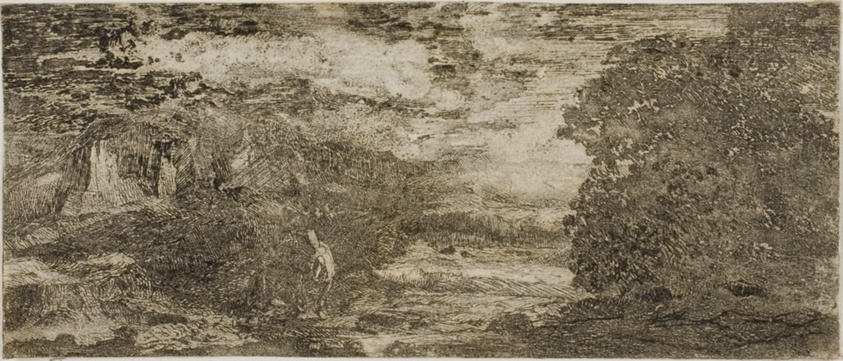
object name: Print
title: Horseman Under a Stormy Sky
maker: Odilon Redon (French, 1840-1916)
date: 1866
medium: Etching on ivory wove paper, cut within plate mark and mounted on light gray wove paper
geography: France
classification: etching; print; prints and drawing; paper